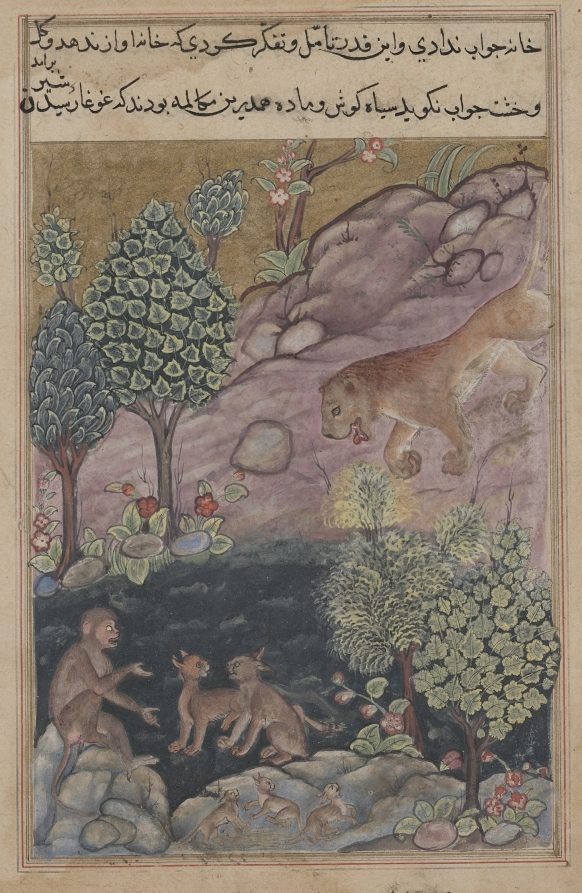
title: The lion returns to his territory and sees the monkey conversing with the lynx, from a Tuti-nama (Tales of a Parrot): Twenty-ninth Night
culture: Mughal India, court of Akbar (reigned 1556–1605)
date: c. 1560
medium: gum tempera, ink, and gold on paper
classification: Painting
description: The lion who rules the meadow returns from a journey to find that his home has been invaded by a family of lynx, who claim that they are its rightful owners. Although this painting depicts all of the animals together, in the text, the lion does not see the lynx and is easily tricked into believing they are fearsome creatures.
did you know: The monkey bares his teeth and gesticulates when he talks.